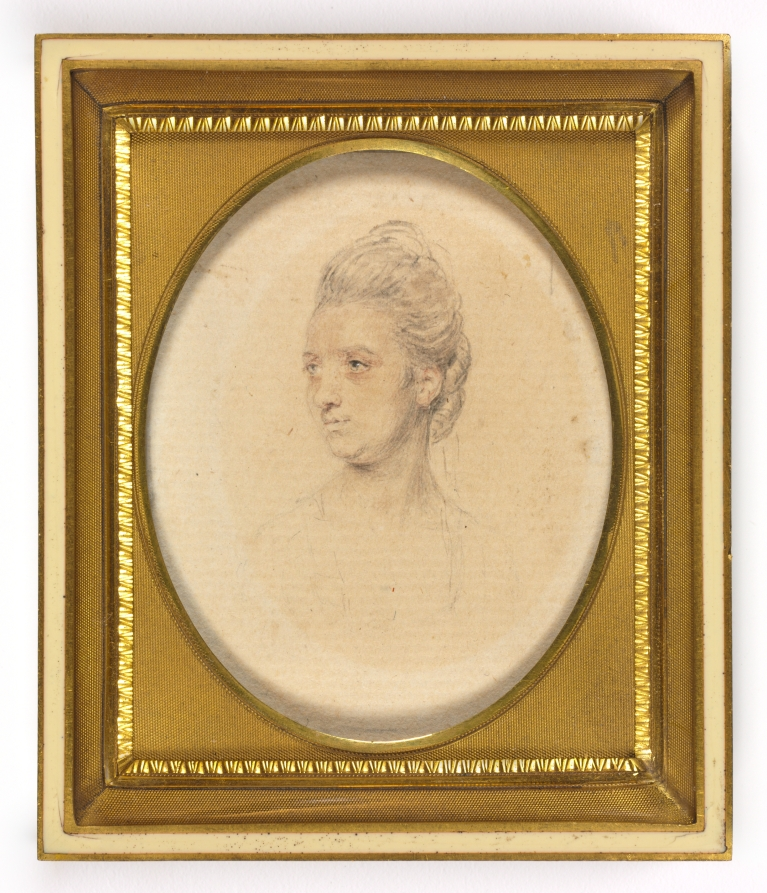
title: Portrait of a Woman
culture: England, 18th century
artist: John I Smart (British, 1741–1811)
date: c. 1772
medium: graphite and wash on laid paper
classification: Portrait Miniature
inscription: inscribed on paper backing: in graphite, upside down at top: 134; in graphite on slant below center: Eleanor of / Spain; on the inside of the outside backing, in center in graphite: M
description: Although it is impossible to say if it was always part of the artist’s process to execute a preparatory sketch prior to painting each miniature, we do know that John Smart retained many hundreds of these sketches. A group of preparatory sketches—of which this portrait is one—descended through the Smirke family after Smart’s daughter Sarah gave a sketchbook containing preparatory portrait studies to her friend Mary Smirke, sister of the celebrated Victorian architect Sydney Smirke. This book was probably broken up around 1877 when it was divided between Sydney’s daughters Mary Jemmett and Mrs. Lange, whose portions were both sold at auction in 1928. This portrait was assigned the historically colorful but fictitious title of “Eleanor of Spain” at some point after memory of its true identity had been lost. Giving illustrious titles to portraits of unknown sitters was a popular strategy adopted by dealers during the nineteenth and twentieth centuries, often applied to miniature portraits and, in particular, to Smart’s sketches of women. The inscription on the paper backing is not in Smart’s hand, and when the paper backing was removed in 1993, no inscriptions were discovered on the back of the drawing itself. Only the sitter’s head and neck are drawn, and a low-necked dress is faintly suggested. Her head is turned to the right, and her light-colored hair is dressed high, with flat curls against the back of her head. She has blue eyes, and the color of her lips is extremely faded, as is the miniature overall. The sitter’s sagging jaw line and the lines beneath her eyes suggest that she was painted as a mature woman. The background is unpainted. A photograph of this sketch in Edward Greene’s notebook indicates that at one time “134” was inscribed on the front in the upper right corner. To this date, the finished ivory for which this preparatory sketch was presumably undertaken has not been discovered. A miniature from the Nelson-Atkins Museum of Art’s Starr collection, while probably not this sketch’s finished ivory counterpart, is closely related in style and date. The Nelson-Atkins unidentified sitter’s veiled hairstyle, position of the head in relation to her squared shoulder, and plump jaw line are identical to the Cleveland sketch. During this stage of Smart’s career, the sitters’ heads were often rather large in relation to their bodies.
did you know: Sketches helped John Smart work out the particulars of a portrait before commencing the miniature on ivory; they were useful in the event that a duplicate might later be required.